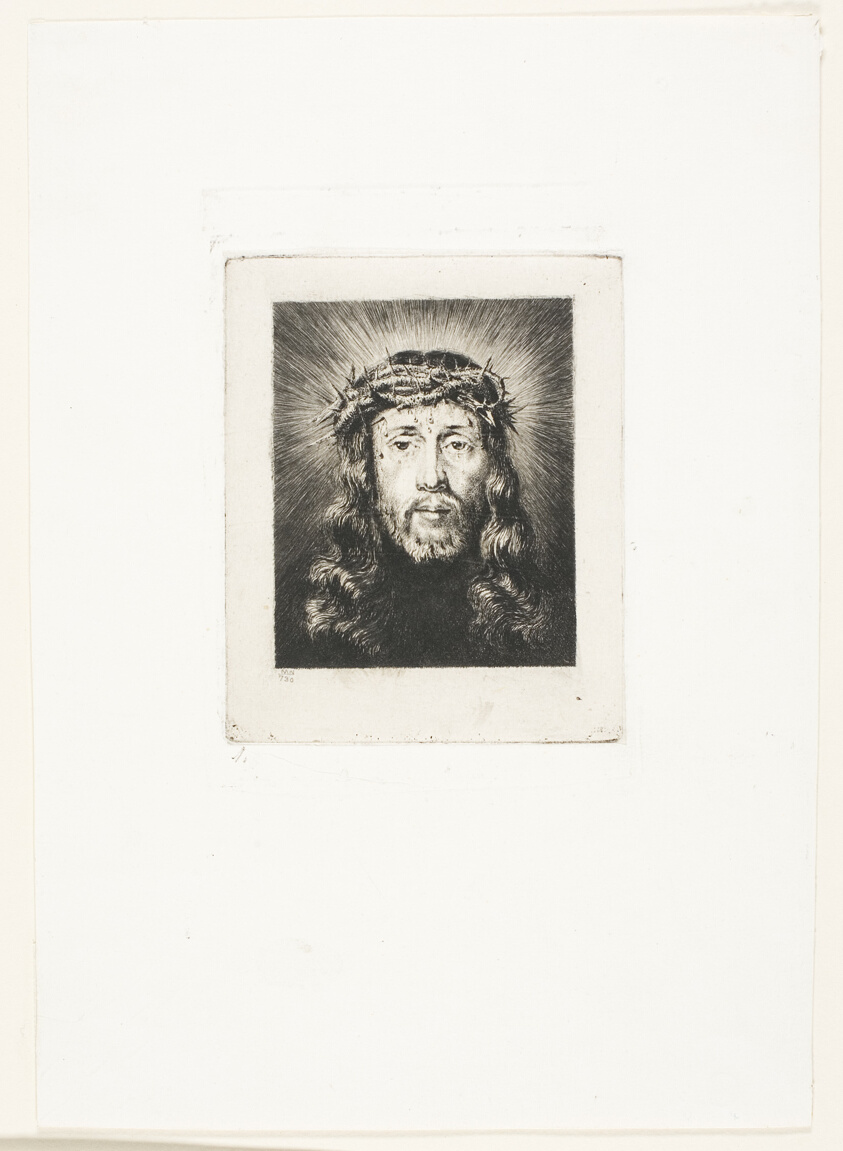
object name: Print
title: The Face of Christ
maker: Charles Meryon (French, 1821-1868); after a minature by Elise Brurère (French, 19th century); after a painting by Philippe de Champaigne (French, 1602-1674)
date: 1849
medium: Etching with roulette on ivory China paper, laid down on ivory wove paper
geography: France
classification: etching; print; prints and drawing